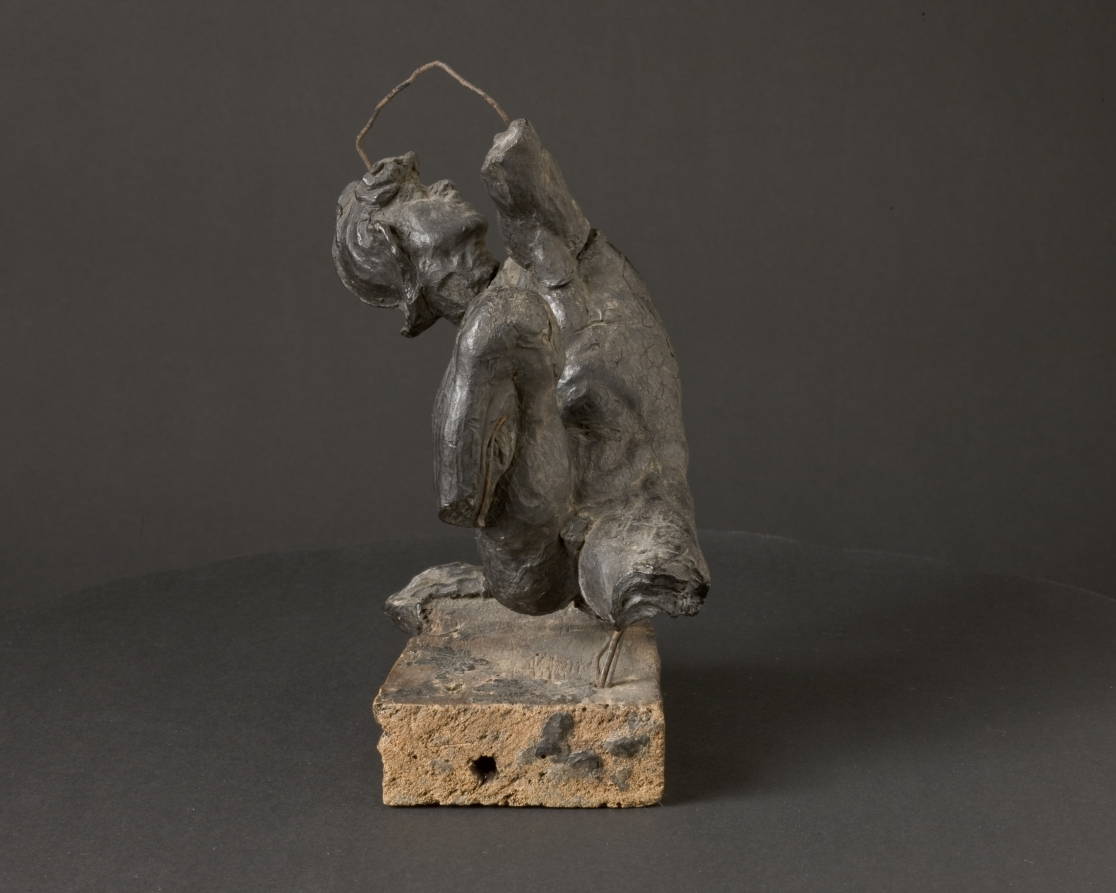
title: Model for a Fallen Warrior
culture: Italy, 16th century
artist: attributed to Giovanni Francesco Rustici (Italian, 1474–1554)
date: c. 1520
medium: wax on a metal armature, mounted on wood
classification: Sculpture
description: Giorgio Vasari (1511–1574), an influential writer and painter, notes in his biography of his contemporary Rustici, that the artist sculpted terracotta battle scenes of groups of horses "with men on their backs or under them." This wax model may be a study for such a group, showing a contorted, helmeted warrior bracing himself after falling to the ground. The figures for these projects were most likely inspired by those in Leonardo's monumental wall painting depicting the Battle of Anghiari for the Hall of the Five Hundred in the Palazzo Vecchio, Florence. Although the fresco was never completed, its pictorial scheme was well known. Rustici later collaborated with Leonardo, and was undoubtedly aware of the major commission and its dynamic portrayal of war.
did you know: Sixteenth-century sculptors often sketched their ideas in three dimensions using wax, clay, or stucco.